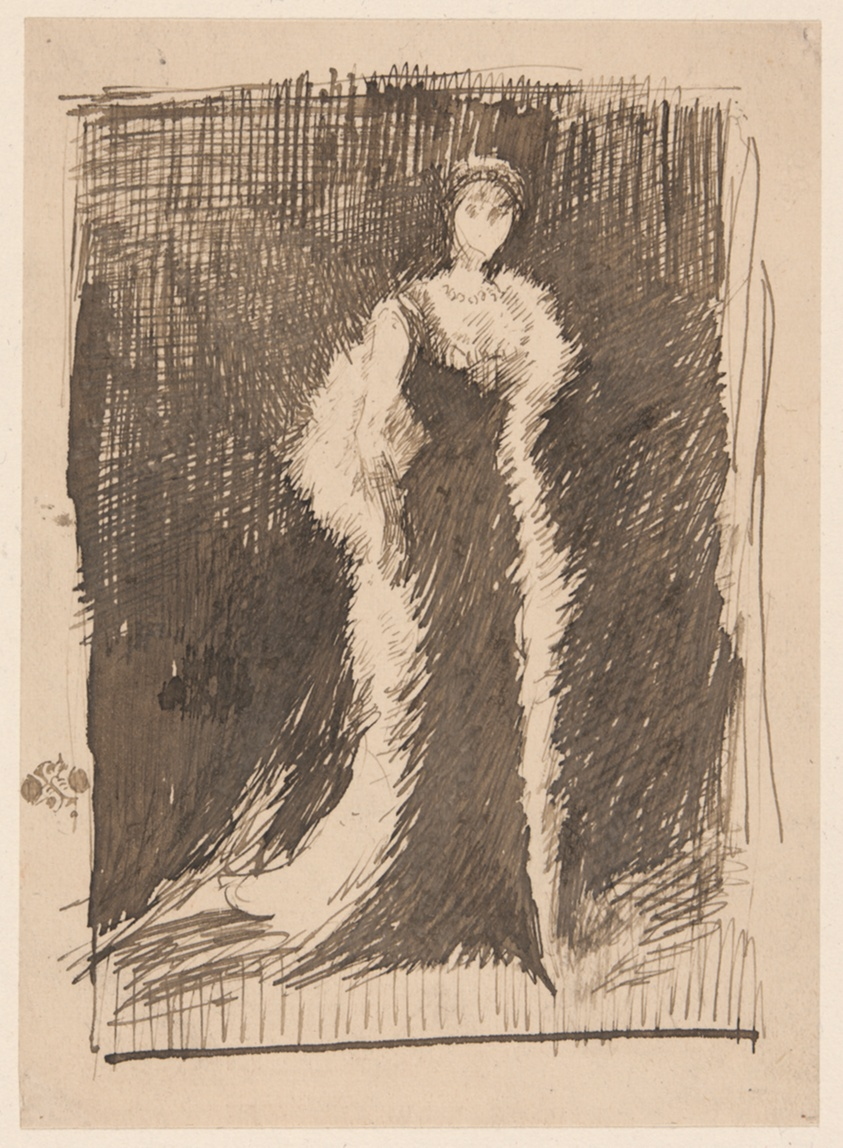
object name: Drawing and Watercolor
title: Sketch after "Arrangement in Black: Lady Meux"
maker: James McNeill Whistler (American, 1834-1903)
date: c. 1881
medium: Pen and brown ink on cream wove paper laid down on ivory board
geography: United States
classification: pen and ink drawings; drawings (visual works); prints and drawing; paper